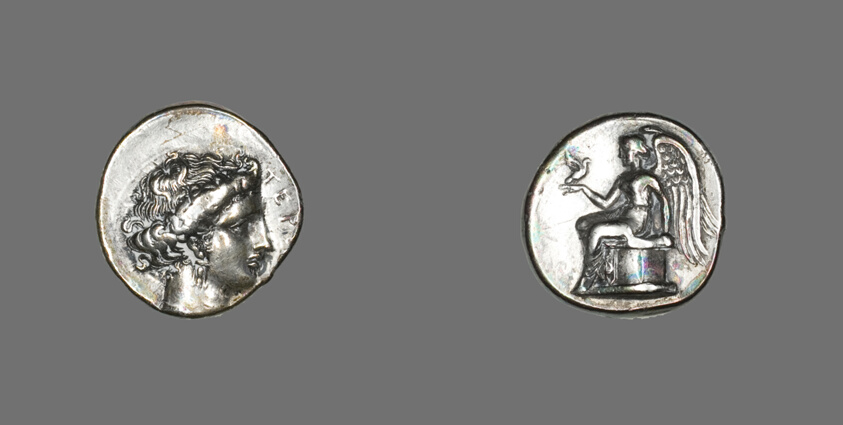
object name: Coin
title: Stater (Coin) Depicting the Nymph Terrina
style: greek, ancient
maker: Greek, minted in Terina, Bruttium, Italy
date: 375-356 BCE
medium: Silver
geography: Sant'Eufemia Vecchia di Lamezia Terme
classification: coin; ancient art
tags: goddesses, victory